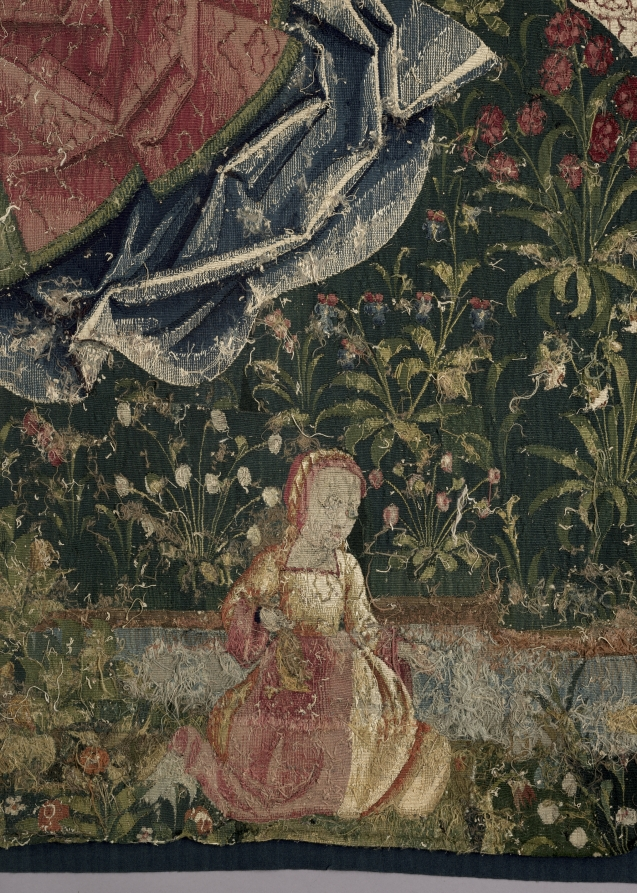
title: The Triumph of Eternity (from Chateau de Chaumont set)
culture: France, Lyon(?), early 16th century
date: 1512–15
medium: silk and wool; tapestry weave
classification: Tapestry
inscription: French verse in Gothic letters translates as follows: "Nothing triumphs by right authority, Unless it be conducted by Eternity. Nothing is permanent beneath the firmament, But above us triumphs Eternity."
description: The Triumph of Eternity is represented by the Coronation of the Virgin. Dressed in crimson velvet with an opulent brocaded velvet shawl, the Virgin is seated in the center as two angels hold a crown over her head. Five musical angels surround her playing an organ, recorder, straight cornetto, harp, and lute, while another sings from an open music book. The scenes in the set display a conservative style in which the figures are placed in shallow landscapes, thereby ignoring pictorial innovations for depicting space and mass. The verse in Old French at the top states: Nothing triumphing by due authority Remains permanent and durable. Nothing is permanent under the heavens, But above, eternity triumphs.